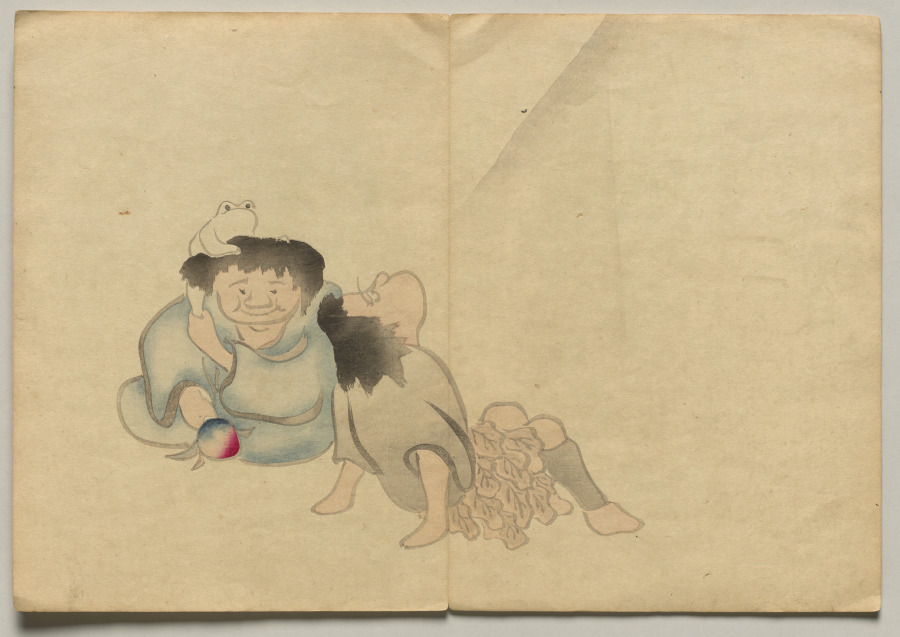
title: Scene from The Kōrin Picture Book (Volume 2)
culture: Japan, Edo period (1615–1868)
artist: Nakamura Hōchū (Japanese, d. 1819)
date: 1800s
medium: color woodblock printed book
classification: Bound Volume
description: Ogata Korin (1658-1716) was one of the most admired artists of Rimpa, or "decorative school painting." These books by the charming later-generation Rimpa artist Hochu record Korin's inventive designs.